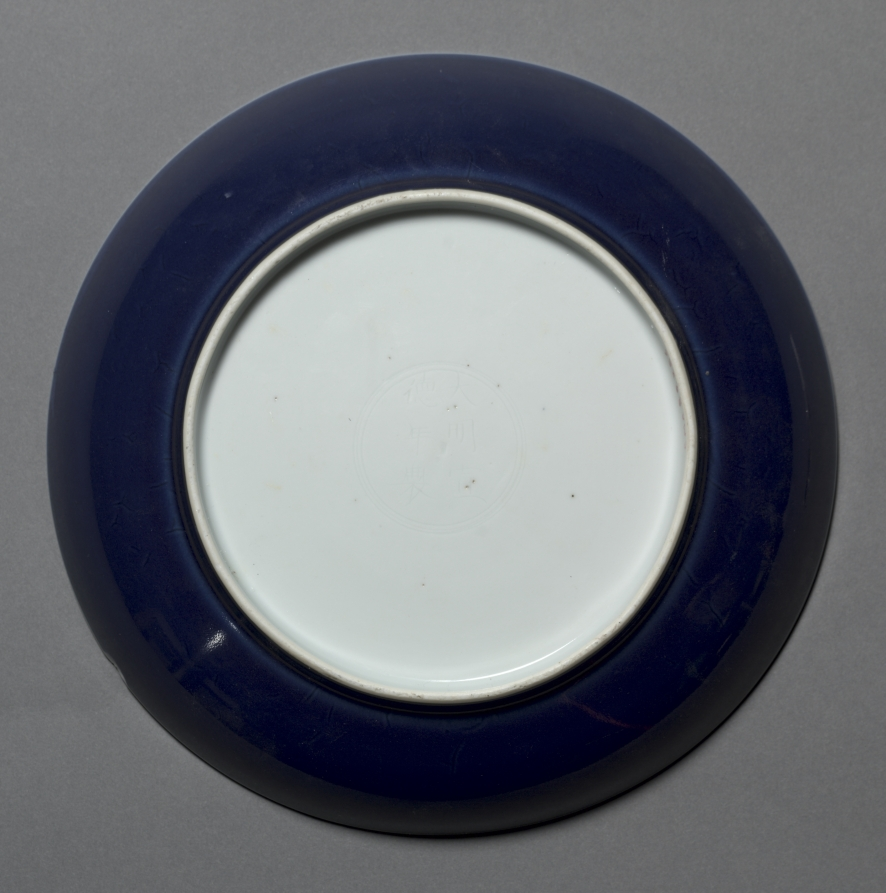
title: Dish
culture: China, Jiangxi province, Jingdezhen kilns, Ming dynasty (1368-1644), Xuande mark and period (1425-1435)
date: 1426–35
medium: porcelain with blue glaze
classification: Ceramic